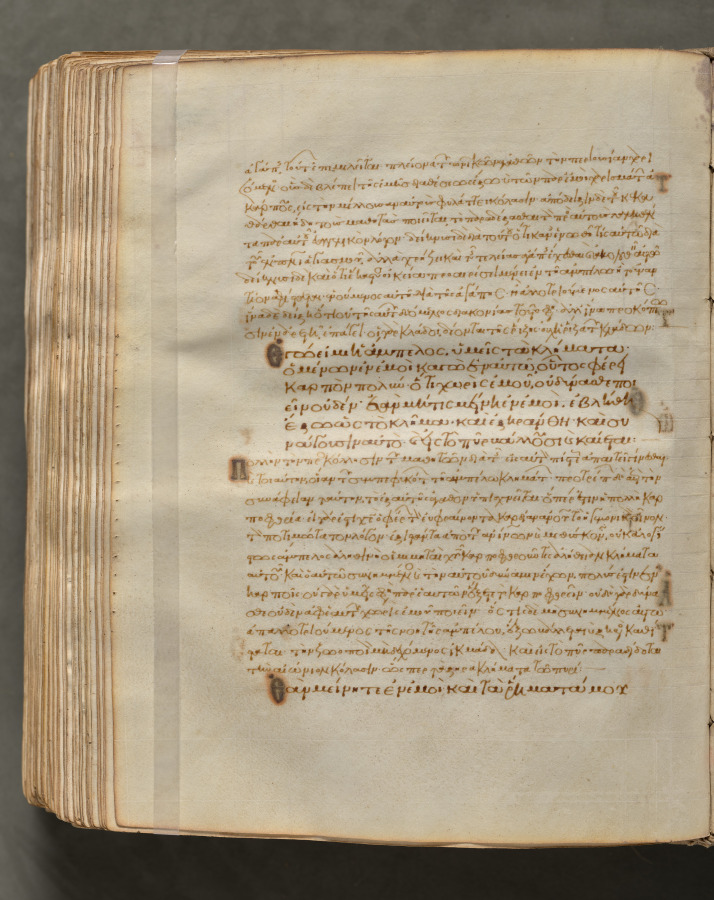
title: Text, folio 396 (verso), from a Gospel Book with Commentaries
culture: Byzantium, Constantinople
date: c. 1000–1100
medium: ink, tempera, and gold on vellum; leather binding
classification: Bound Volume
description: Each of the four gospels in this book opens on a page with brilliantly illuminated borders depicting the author of the text as well as birds—principally peacocks, symbols of the immortality of the soul—and fountains, representing the fountain of life and the salvation of the soul. This volume consists of 428 leaves with texts in Greek. Its level of sophistication suggests that it was probably written and decorated in a monastery in Constantinople.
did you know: Gospel books were carried in procession through Byzantine churches.